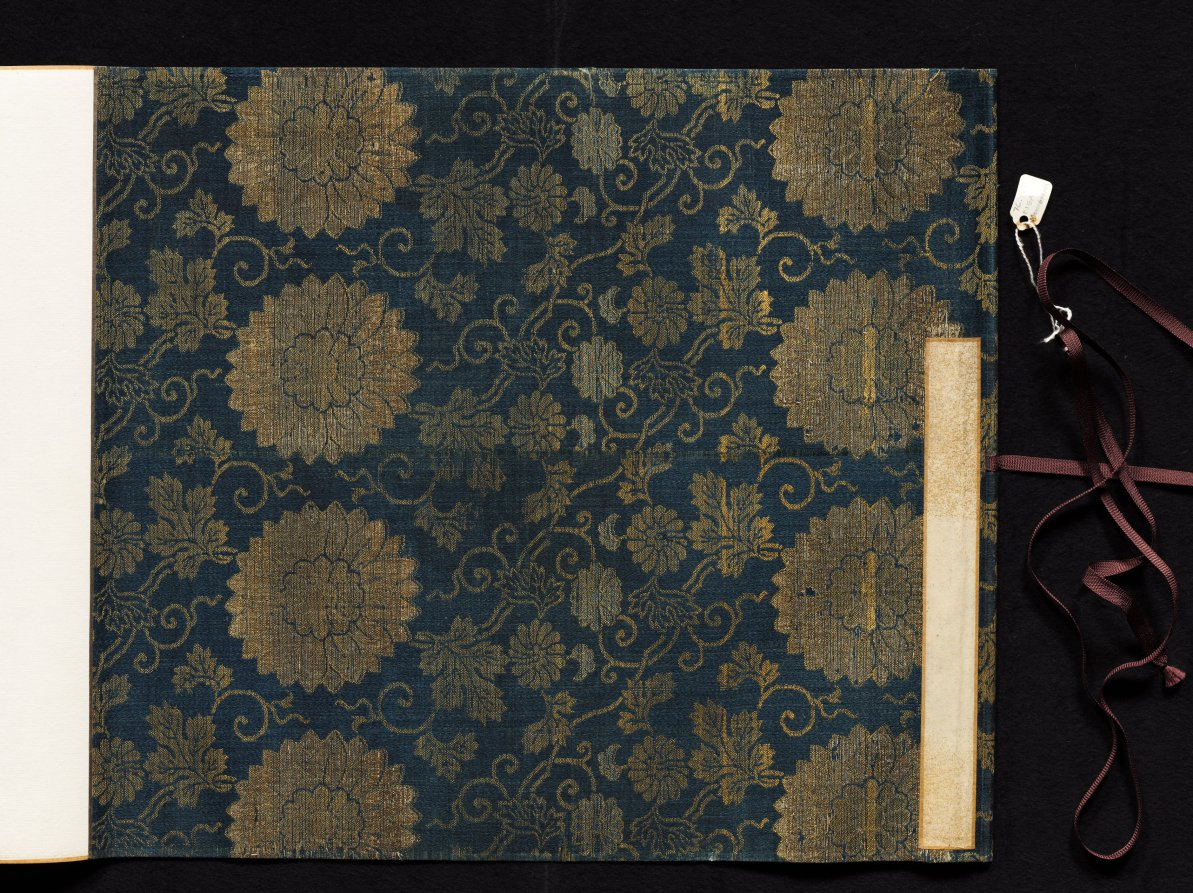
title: The Emperor's Attendance at the Horse Race: Episode from the Tale of Eiga (Eiga Monogatari)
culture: Japan, Kamakura period (1185–1333)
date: c. 1200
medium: handscroll; ink and color on paper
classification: Painting